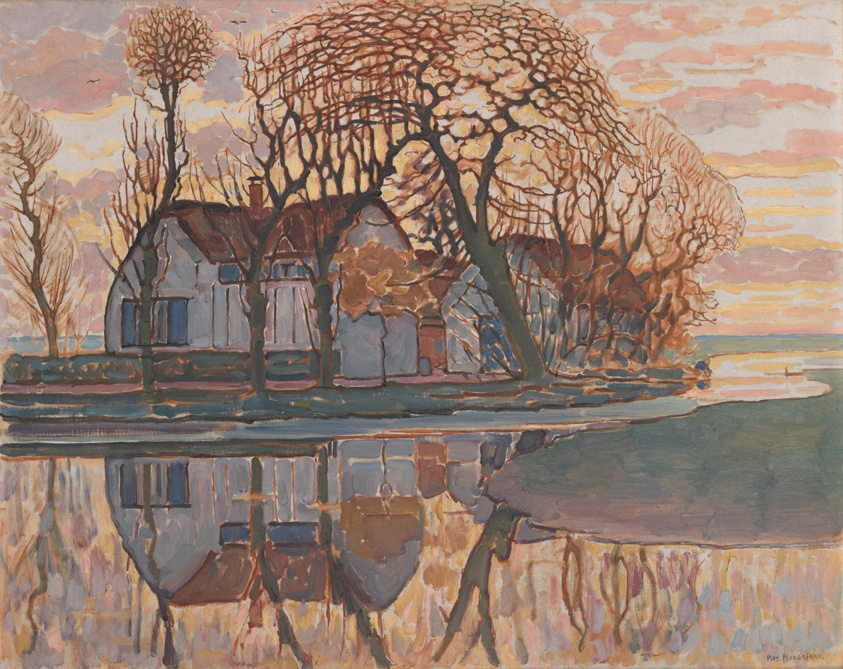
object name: Painting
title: Farm near Duivendrecht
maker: Piet Mondrian (Dutch, 1872–1944)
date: c. 1916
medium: Oil on canvas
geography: Netherlands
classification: oil on canvas; painting; modern and contemporary art